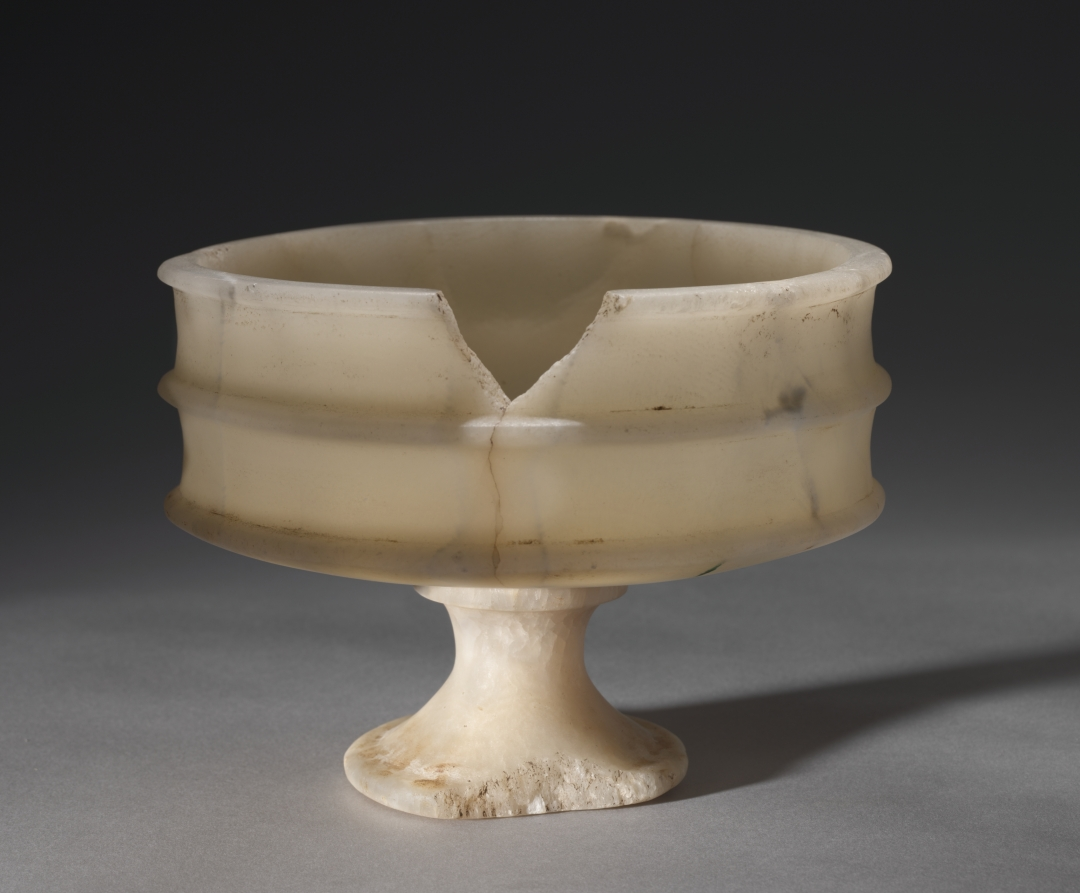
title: Ribbed Bowl (Tazza)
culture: Egypt, New Kingdom (1540–1069 BCE), Dynasty 18, reign of Amenhotep III (1390–1352 BCE)–reign of Akhenaten (1351–1334 BCE)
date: 1391–1337 BCE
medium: travertine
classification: Vessels